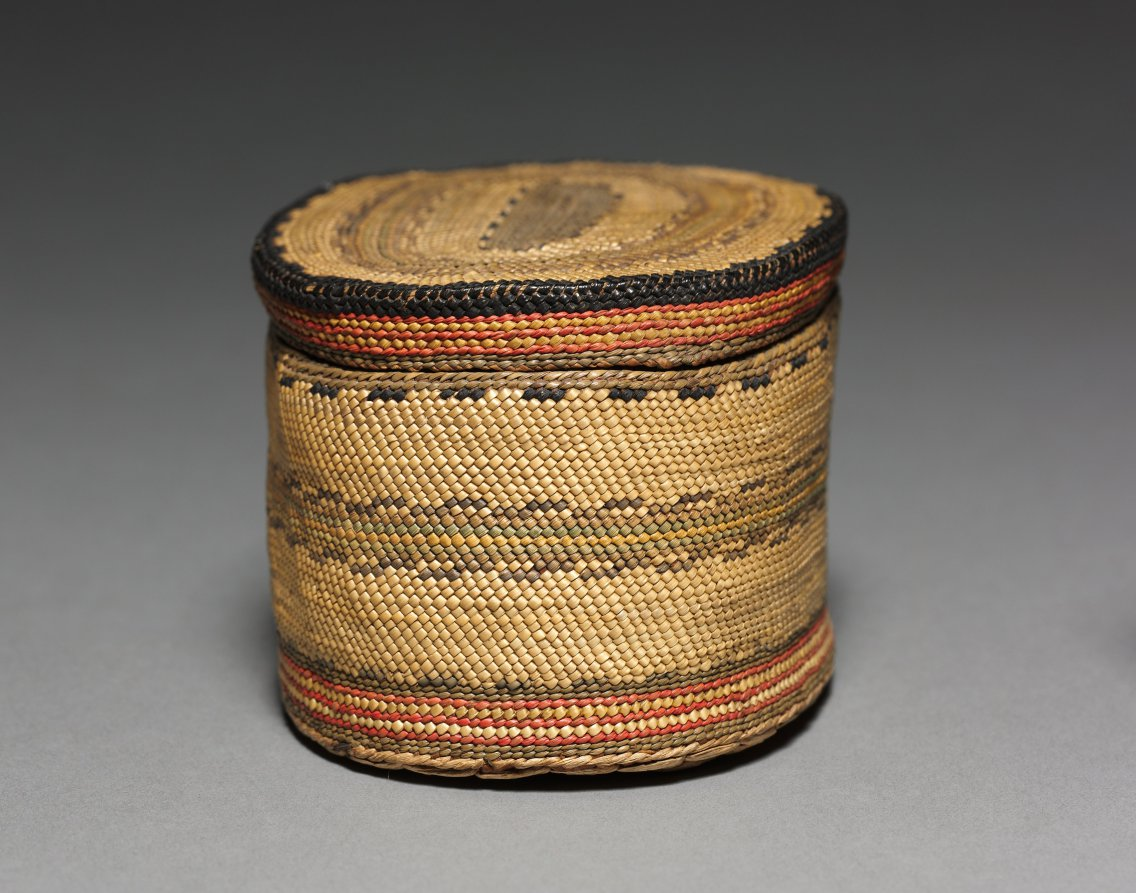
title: Lidded Bowl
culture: Northwest Coast, Vancouver Island, early 20th century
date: c 1900– 1925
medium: twined grass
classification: Basketry